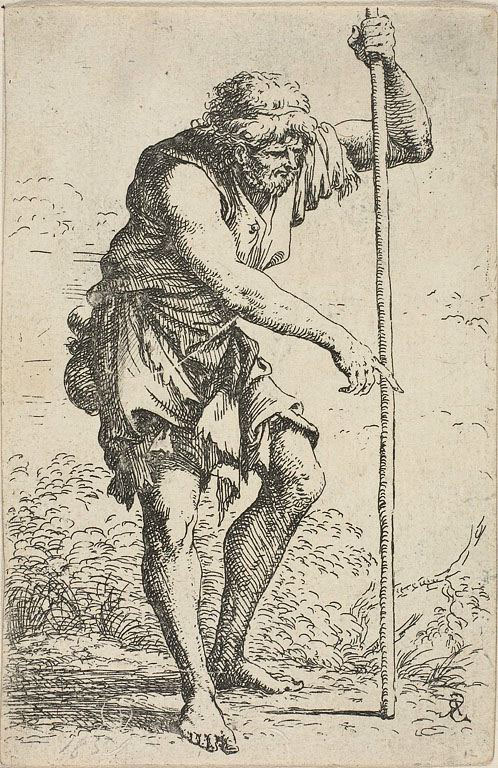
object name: Print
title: An Old, Ragged Man with a Staff and a Ground at his Hip, from Figurina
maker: Salvator Rosa (Italian, 1615-1673)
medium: Etching on ivory laid paper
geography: Italy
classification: etching; print; prints and drawing